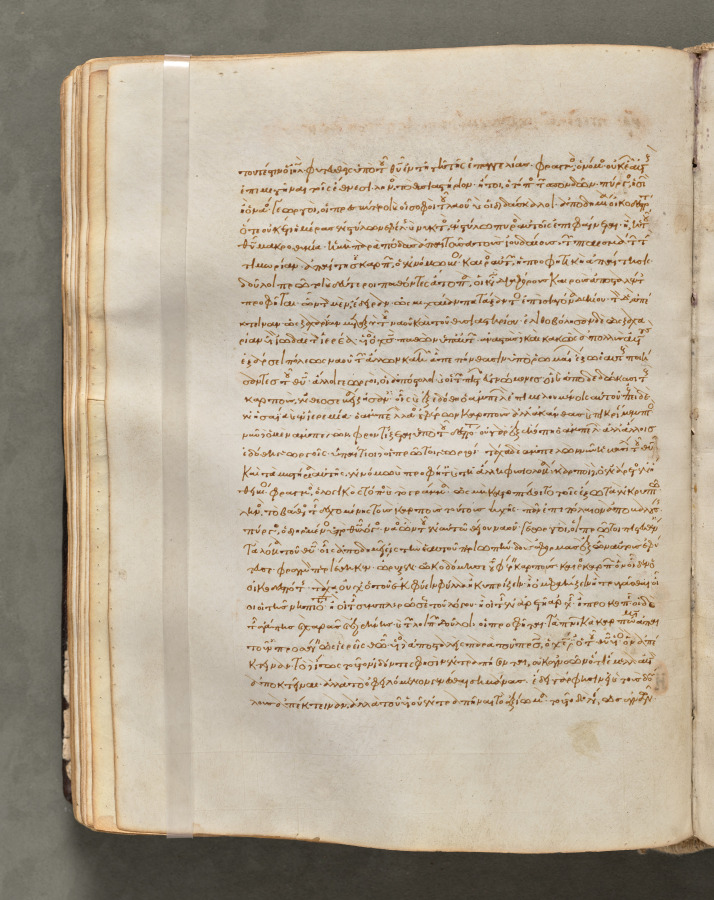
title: Text, folio 95 (verso), from a Gospel Book with Commentaries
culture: Byzantium, Constantinople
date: c. 1000–1100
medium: ink, tempera, and gold on vellum; leather binding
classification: Bound Volume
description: Each of the four gospels in this book opens on a page with brilliantly illuminated borders depicting the author of the text as well as birds-principally peacocks, symbols of the immortality of the soul-and fountains, representing the fountain of life and the salvation of the soul. This volume consists of 428 leaves with texts in Greek. Its level of sophistication suggests that it was probably written and decorated in a monastery in Constantinople.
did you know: Gospel Books were carried in procession through Byzantine churches.